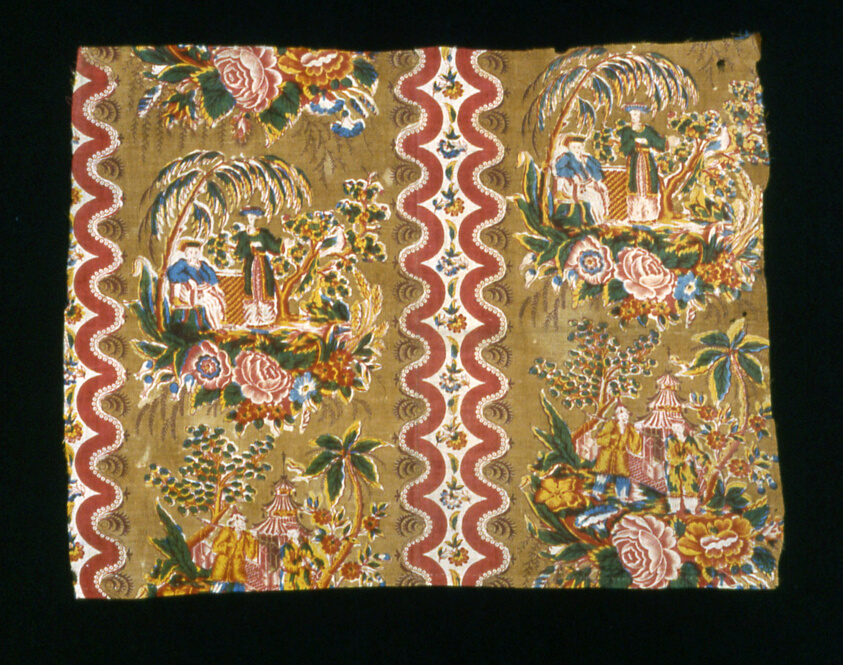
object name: Textile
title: Fragment (Furnishing Fabric)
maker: England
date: c. 1825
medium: Cotton, plain weave; roller printed, with additional color added by surface printing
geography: England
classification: textile; weaving - printed; furnishing textile